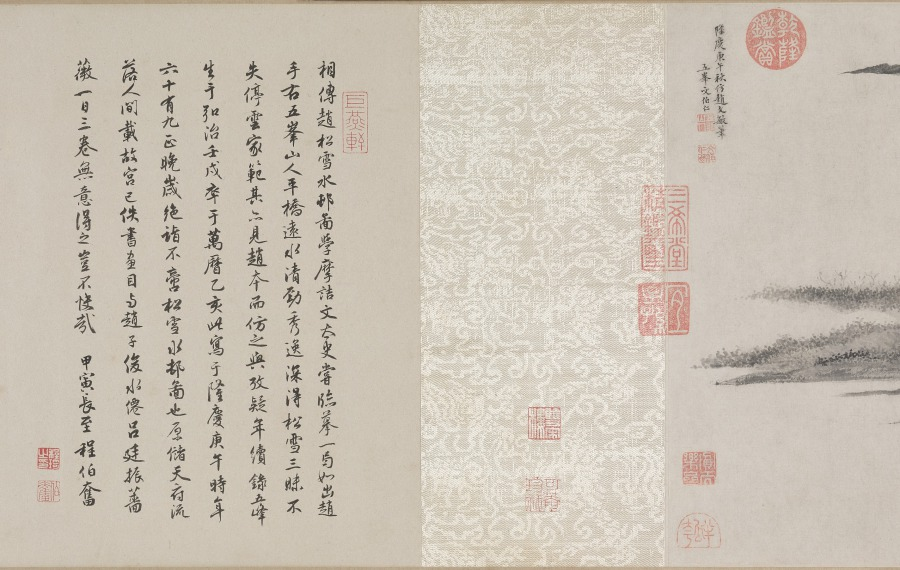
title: Water Village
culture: China, Ming dynasty (1368–1644)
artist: Wen Boren (Chinese, 1502–1575)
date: 1570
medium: handscroll; ink and light color on paper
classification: Painting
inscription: 隆慶庚午秋仿趙文敏筆. 五峰文伯仁 [印] 五峰山人; 文伯仁印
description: In the autumn of 1570, Wen Boren painted this seemingly unemotional scene of low-lying marshlands with a chain of rounded mountains in the background. A fishing boat is nestled on the shore near the village. Although paths and bridges traverse the landscape, only two people are visible in the stillness. From the restrained atmosphere of this landscape, one would never guess that Wen Boren was known as the “bad boy” of the Wu School for his explosive temper. As a younger man, he was even embroiled in a contentious lawsuit with his own uncle, Wen Zhengming (1470–1559), a master of Ming dynasty painting with whom he had trained. The ideal of the scholar-painter, or literati, was that an artist’s moral character is reflected in his paintings, so there was great incongruity between Wen Boren’s difficult personality and his restrained landscapes. A contemporary, Wang Shizhen, wrote this about him: "This gentleman is prone to behave odiously and screamed accusations at people. How is it possible for him to carry in his bosom such a wealth of scenic wonders?" Who knows what effort it took to subdue his fractious spirit to project an image of coolness and refined taste in his paintings?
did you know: A foreground tree has an eccentric twisting silhouette and pepper-dot "halo" of leaves.